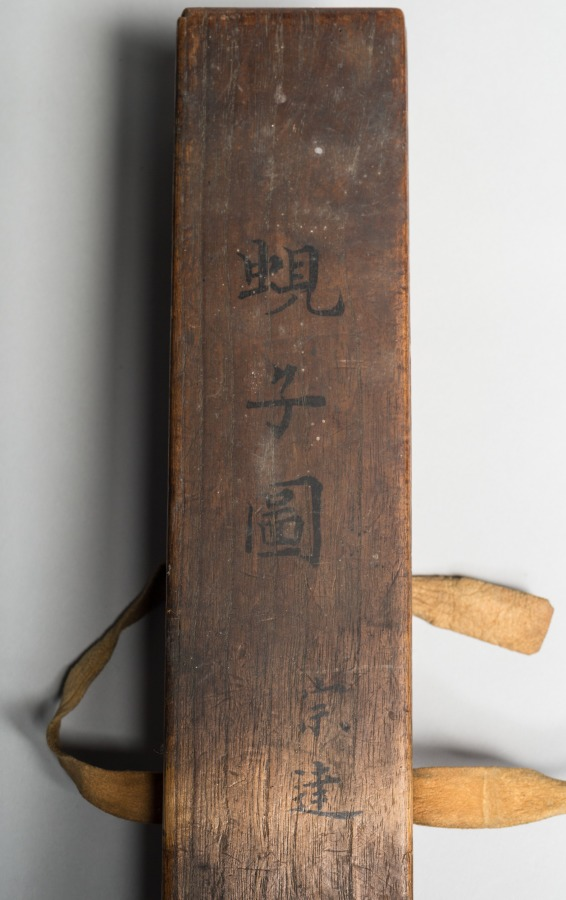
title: Kenshu, Monk with Shrimp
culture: Japan, Edo period (1615–1868)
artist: studio of Tawaraya Sōtatsu (Japanese, c. 1570–c. 1640)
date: c. 1600–1640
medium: hanging scroll; ink on paper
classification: Painting